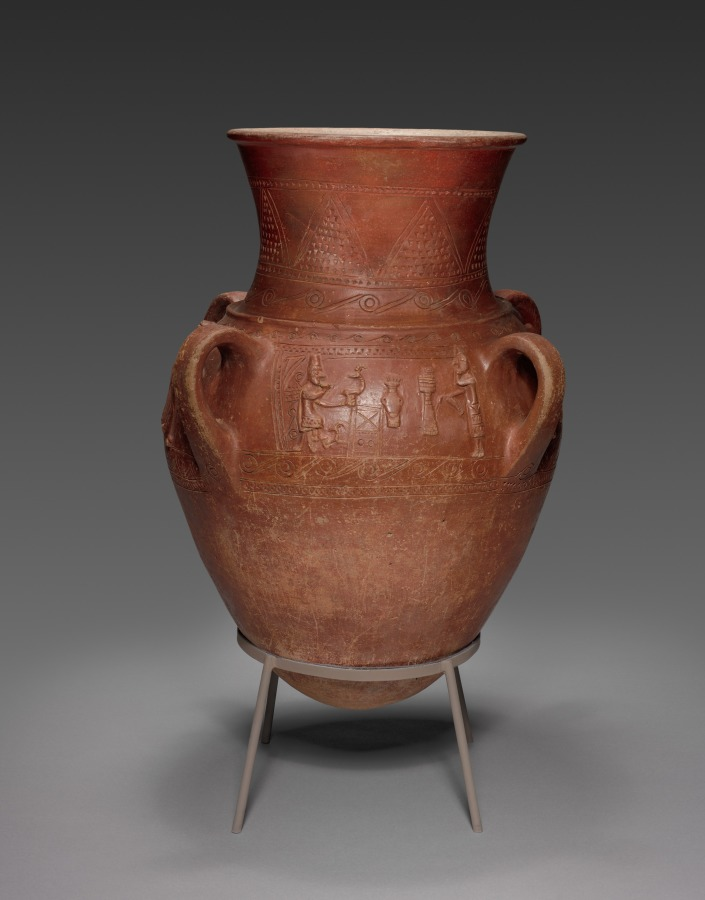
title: Hittite Vessel with Four Scenes Molded and Carved in Relief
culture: Eastern Turkey, Hittite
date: 1400–1200 BCE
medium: burnished earthenware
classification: Ceramic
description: The Hittites were a powerful people who vied with the Egyptians for control of the Near East. At times, however, alliances in the form of royal marriages were forged between the two rivals. The scene on the front of this vase shows a seated god or king holding a drinking vase in the form of a stag. Near him is a large-handled vessel in a ring stand, which illustrates how large jars such as this one were used. The standing figure is a priest pouring a liquid offering. The scene on the back of this vase shows a bow hunter using a doe with a tether as a decoy to attract a stag. Some of the hunter's arrows have already pierced the stag's hide.